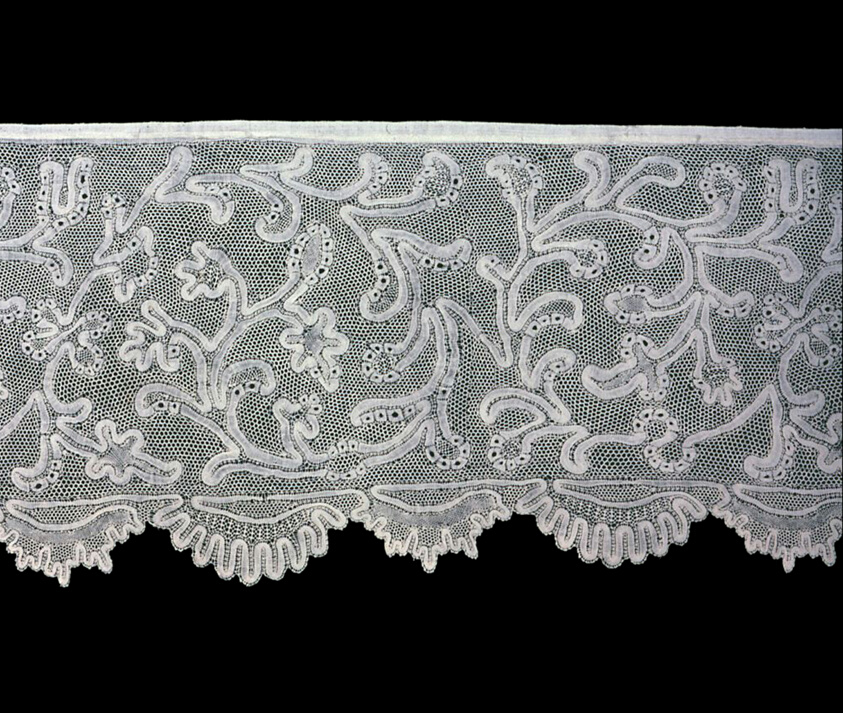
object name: Textile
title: Border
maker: Probably Italy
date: 1725/50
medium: Linen, bobbin part lace (continuous clothwork tapes with decorative openings)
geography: Italy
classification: textile; lace - bobbin